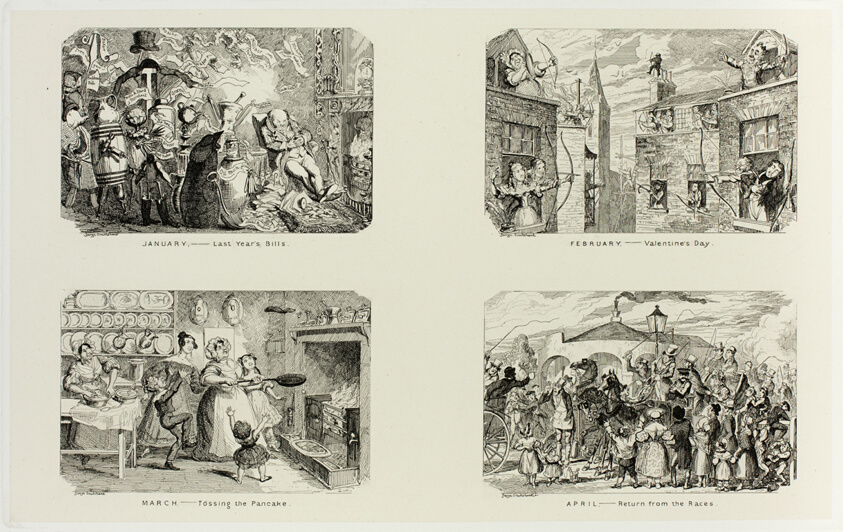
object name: Print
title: January – Last Year's Bills from George Cruikshank's Steel Etchings to The Comic Almanacks: 1835-1853 (top left)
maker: George Cruikshank (English, 1792-1878); published by Pickering & Chatto (English, 19th century)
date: 1837, printed c. 1880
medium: Four steel etchings in black on cream India paper, laid down on off-white card (chine collé)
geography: England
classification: etching; paper; print; prints and drawing